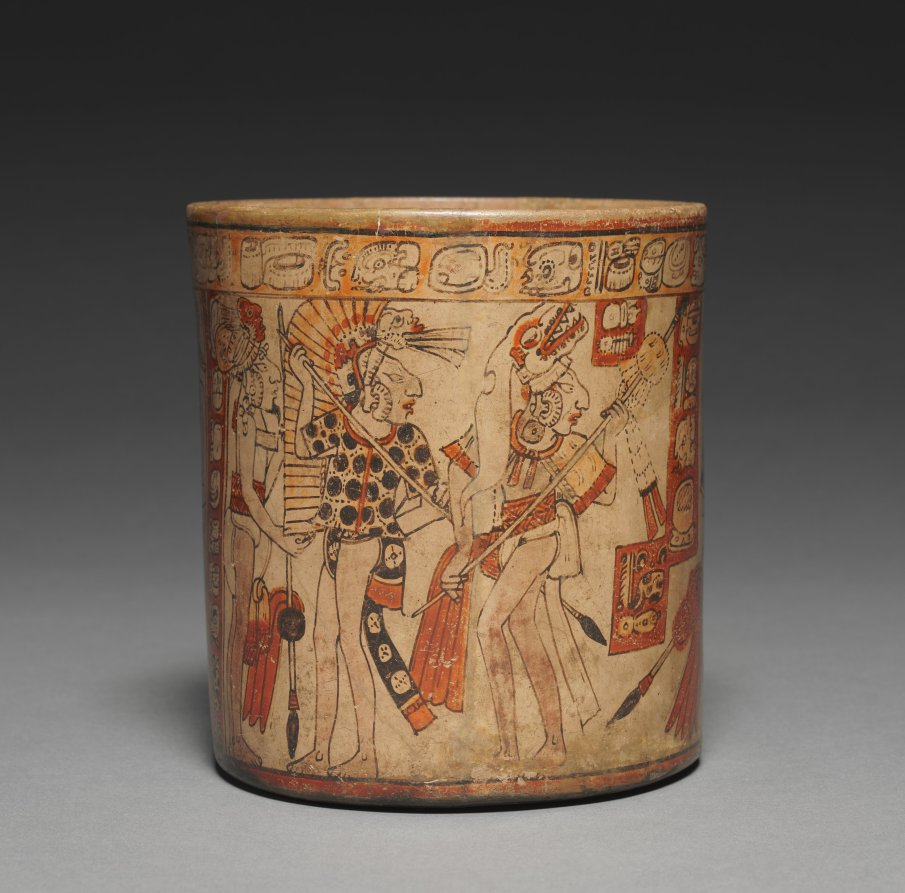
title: Vessel with Battle Scene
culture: Mesoamerica, Maya, Nebaj region, Late Classic Period, 7th-10th century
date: 600–900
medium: ceramic and slip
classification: Ceramic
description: Likely used as a political gift, this vessel depicts the presentation of prisoners in the aftermath of battle. A front-facing lord turns to review ten elegantly drawn warriors, some stripped of battle regalia and others dressed in elaborate headgear and garments, including tunics made of jaguar pelts. The hieroglyphs encircling the rim dedicate the vessel, used to drink an elite beverage made of cacao (chocolate) beans.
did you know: The Maya drank a chocolaty beverage with a spicy kick! Made using cacao seeds and chili peppers, the drink was consumed out of vessels like this one.